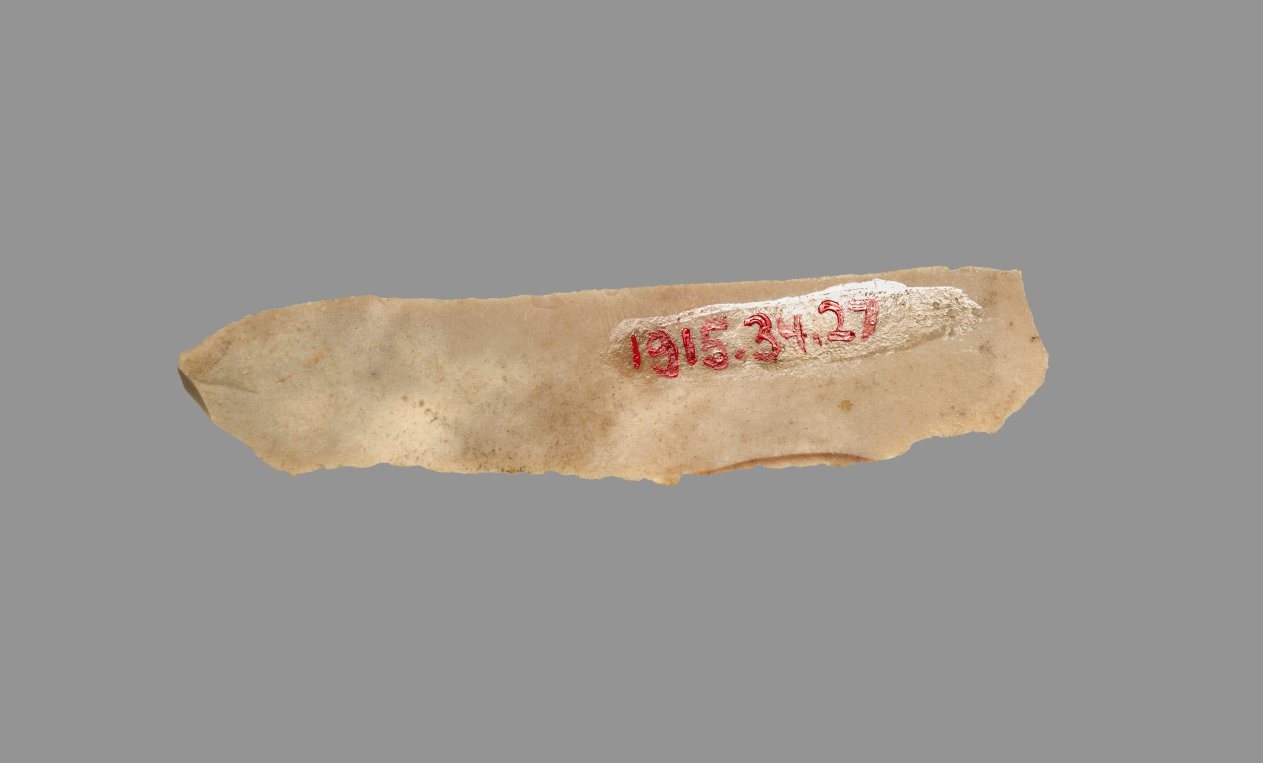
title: Sickle Blade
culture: Egypt, Middle Kingdom (2040–1648 BCE), Dynasty 12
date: 1980–1801 BCE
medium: flint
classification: Implements